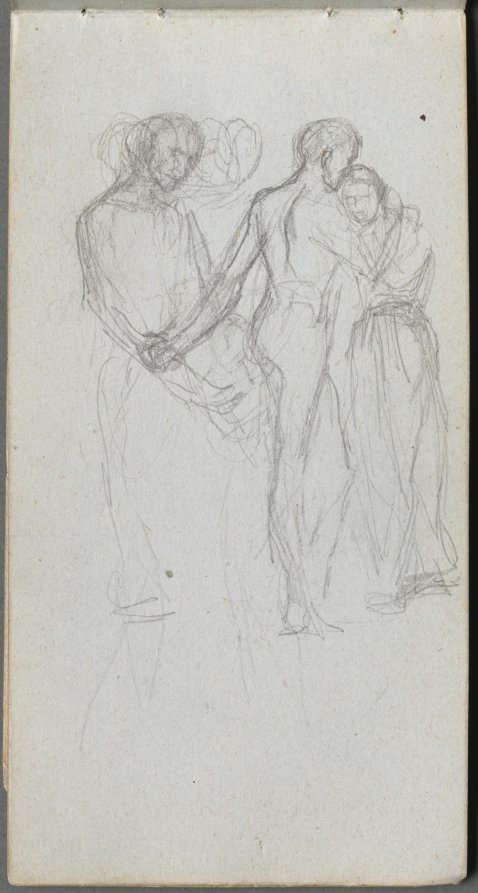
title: Sketchbook, page 10: Figures Embracing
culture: France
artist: Ernest Meissonier (French, 1815–1891)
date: c. 1860s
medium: graphite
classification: Bound Volume